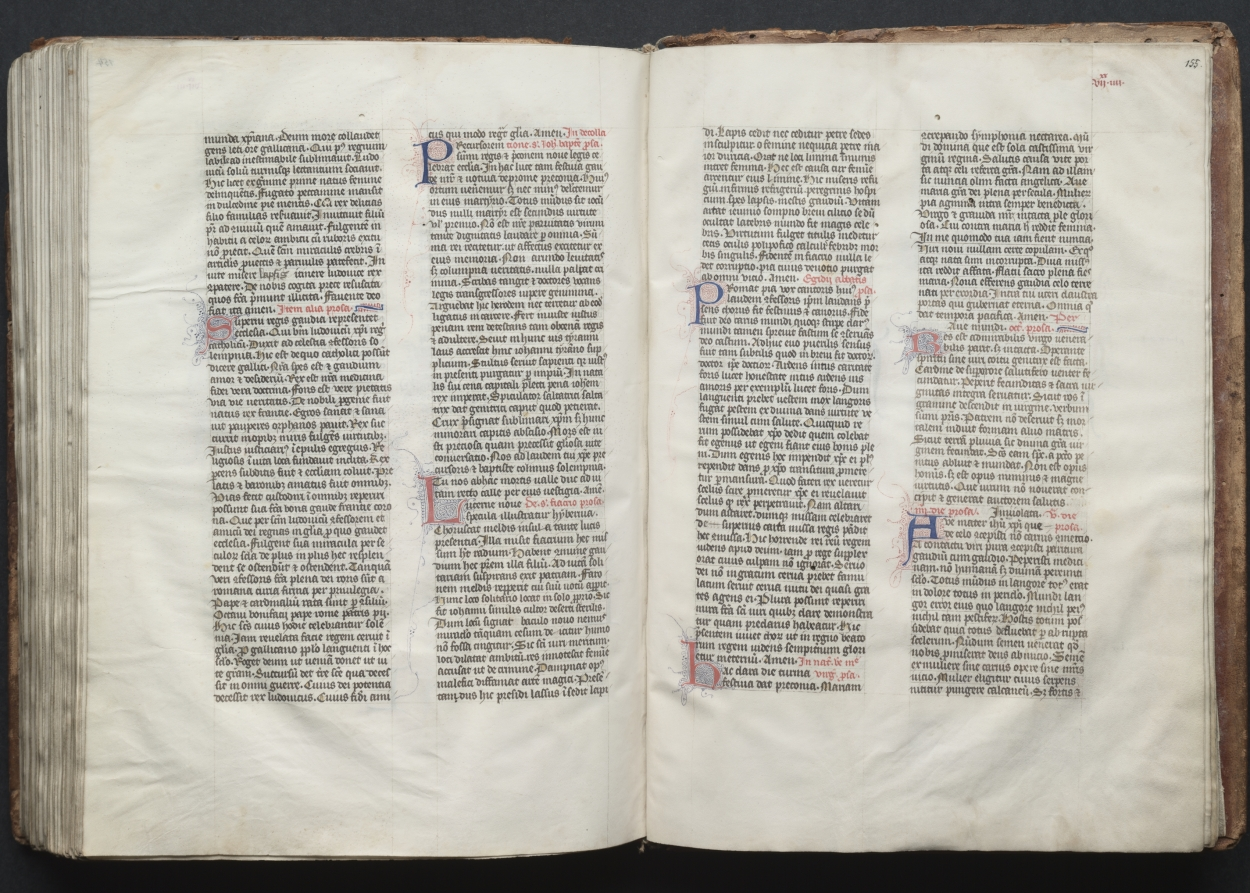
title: The Gotha Missal: Fol. 154v, Text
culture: France, Paris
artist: Master of the Boqueteaux (French)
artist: and Workshop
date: c. 1375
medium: ink, tempera, and gold on vellum; blind-tooled leather binding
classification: Bound Volume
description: The style and quality of this manuscript's decoration is typical of deluxe Parisian books made for aristocratic or royal patrons. Most of the book's decoration appears to be the work of the Master of the Boqueteaux, an artist active at the court of King Charles V (died 1380). His style was apparently shared by a number of book illuminators working in and around Paris. It is very possible that the Gotha Missal belonged to Charles V, but is not provable because the manuscript has no royal portraits and lacks a colophon. Given the book's magnificent decoration, however, it would seem that it was produced for a Valois prince, if not for the king himself. The manuscript receives its name from the German dukes of Gotha, its later owners.